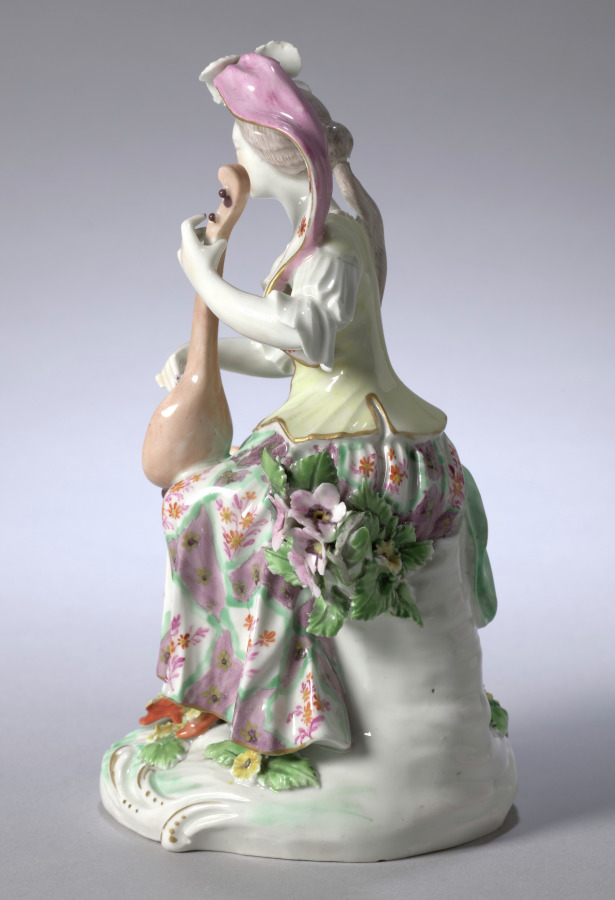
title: Seated Musician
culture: England, Derby, 18th century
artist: Derby Porcelain Factory (British)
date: c. 1765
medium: soft-paste porcelain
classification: Ceramic